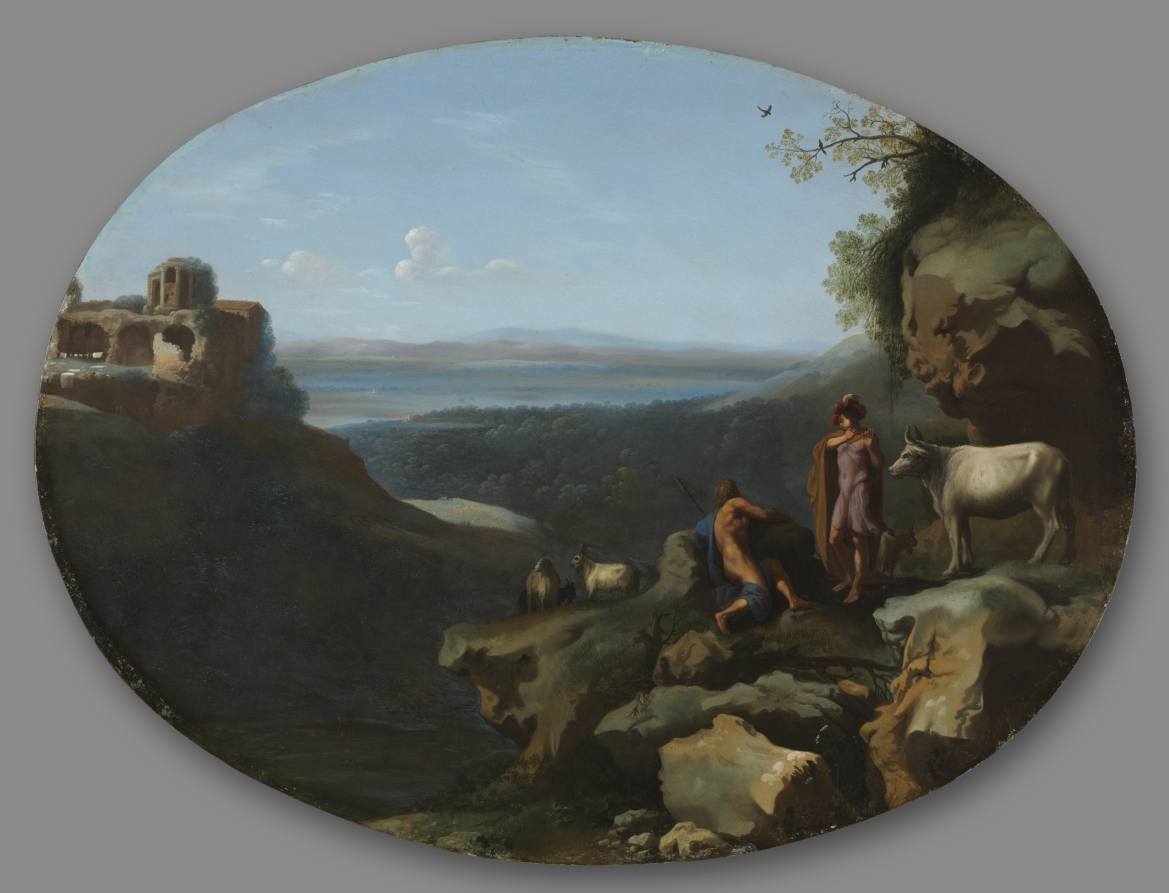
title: Mercury and Argus in a Landscape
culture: Netherlands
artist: Dirck van der Lisse (Dutch, 1669)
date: c. 1635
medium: oil on copper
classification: Painting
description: This painting depicts a scene from ancient myth. The queen of the gods, Juno, jealous of her husband Jupiter's affair with Io, changed the mortal woman into a cow. Juno then ordered Argus - a giant with many eyes - to watch over Io constantly. In response, Zeus sent Mercury, the god of deception, to free Io. Mercury lulled Argus to sleep by playing the flute, then killed him and released the cow. The artist set the scene in a landscape with classical ruins. The expansive vista belongs to an earlier tradition that evokes the immenseness of the world through panoramic views, offering the suggestion of boundless space.